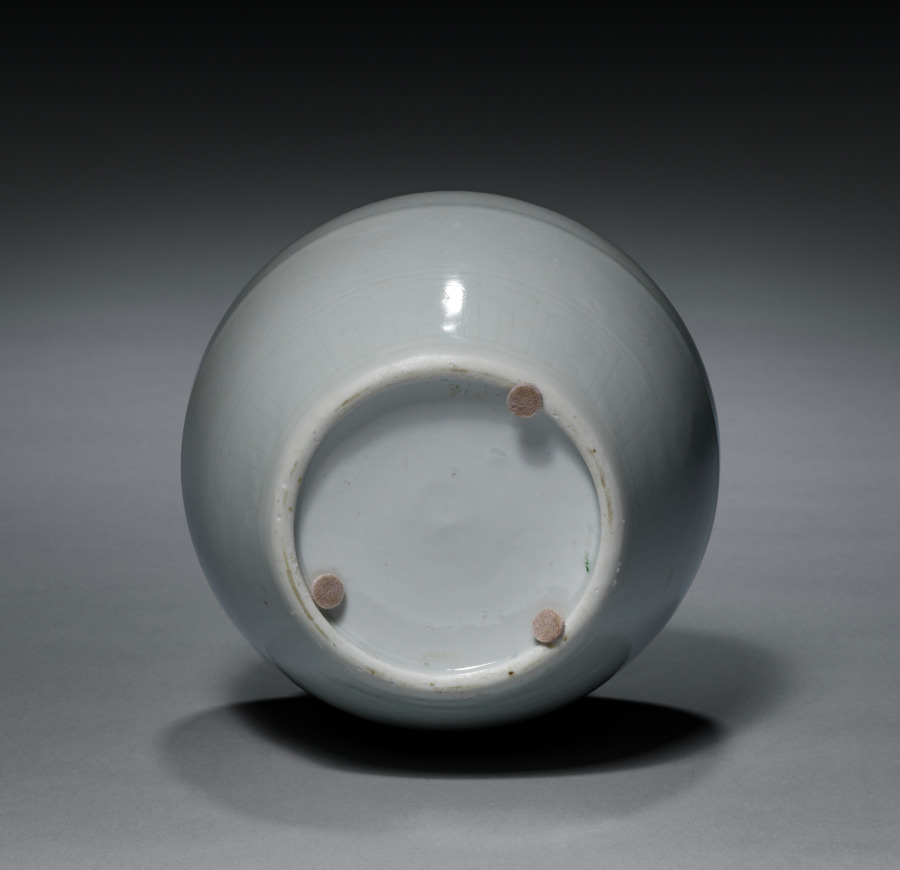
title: White-Glazed Jar with Hidden Design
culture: China, Jiangxi province, Jingdezhen kilns, Ming dynasty (1368-1644)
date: 1500s–1600s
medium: Porcelain with sweet-white (tianbai; 甜白) glaze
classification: Ceramic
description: White was a ritual color used in Buddhist ceremonies, as well as the color of mourning. This jar is made of two molded halves that were joined where the vessel’s middle section shows a raised line. It is covered by a silky white glaze called “sweet-white” (tianbai; 甜白). A “hidden design” (anhua; 暗花) of floral scrolls on the shoulder and stylized petals around the base shine through the glaze. The jar may have been used as a planter, a vase for flowers, or it may have held incense sticks on a home altar.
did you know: Tianbai, or sweet-white glaze, was developed to accommodate the Yongle emperor’s (reigned 1403–24) preference for white ceramics.